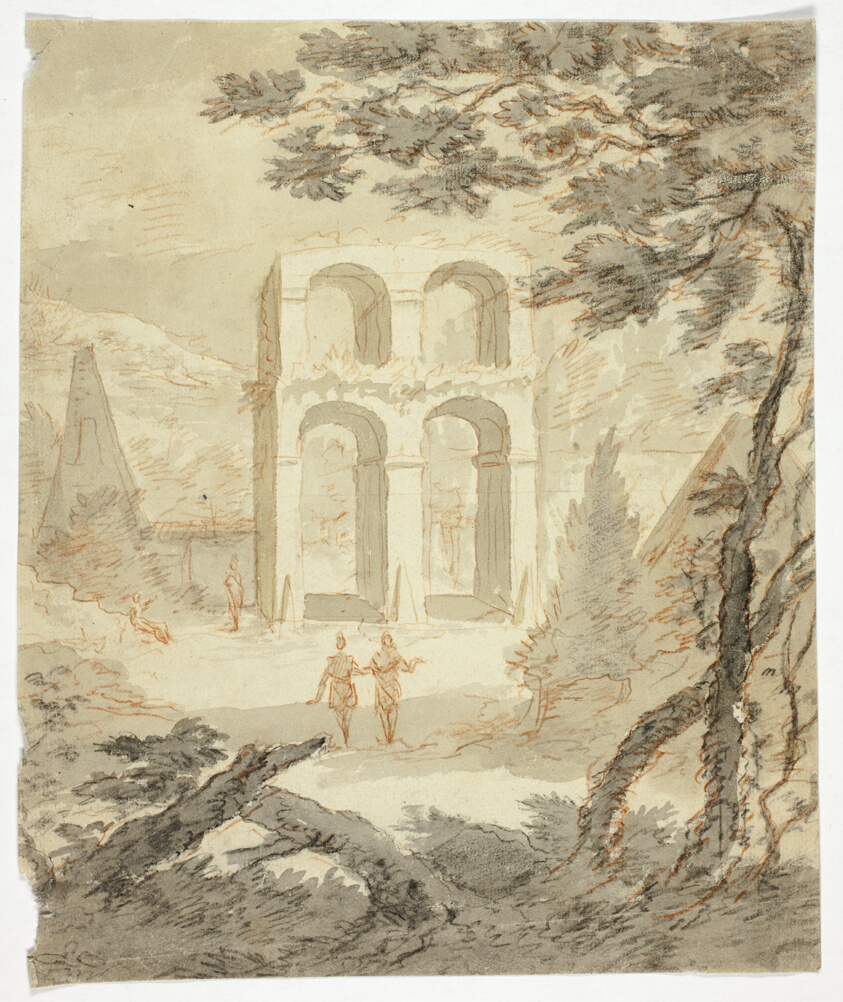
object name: Drawing and Watercolor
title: Figures Among Classical Ruins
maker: Gerrit Rademaker (Dutch, 1672-1711)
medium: Black and red chalk, with brush and gray wash, on ivory laid paper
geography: Holland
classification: ink or chalk wash; drawings (visual works); prints and drawing